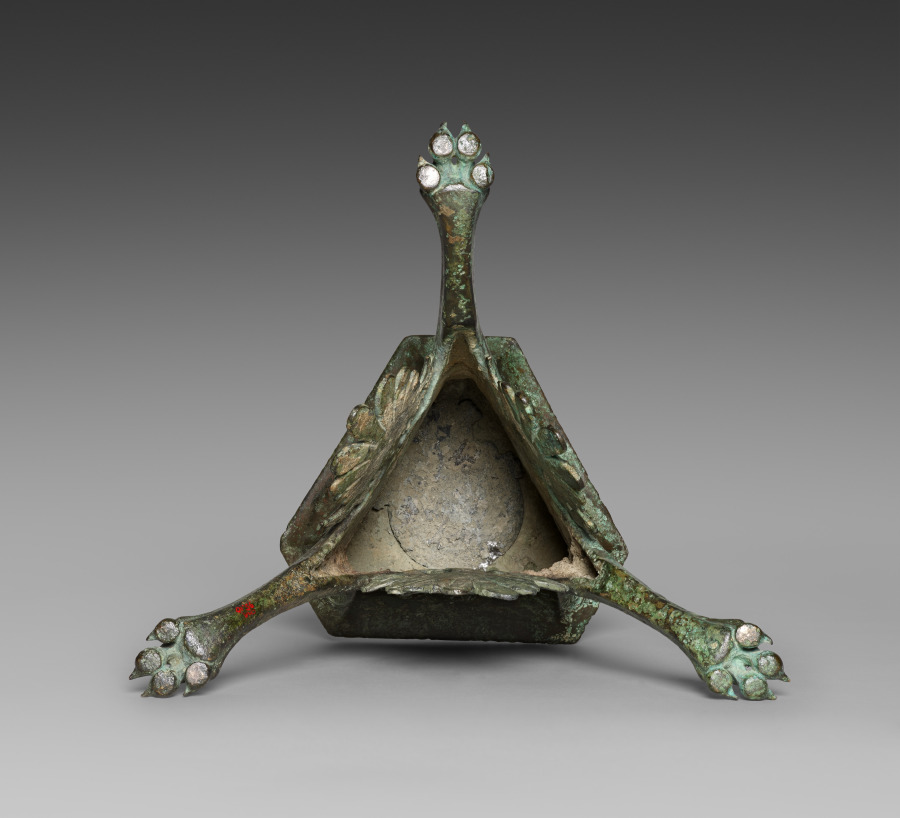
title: Tripod Base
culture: Italy, Roman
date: 100–1 BCE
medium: bronze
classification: Sculpture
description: This unusual tripod base features three clawed feet, an abundance of vegetal ornament, and three different figural scenes in low relief. Two seem to show sanctuary settings: first, a small Archaistic statue of Athena flanked by a woman with small offerings and a man holding a kid and leading two goats; and second, a small youthful male statue behind two beardless figures—perhaps Apollo, with a stag, and Dionysos, holding a thyrsos. The third scene shows Herakles, holding a club while leading a woman, maybe Auge or Alcestis. Although perhaps similarly eclectic in style, the base and the sculpture it now supports differ in their alloys and patinas.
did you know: This elaborate base may have originally supported an ornate lamp (not the statuette now displayed atop it).